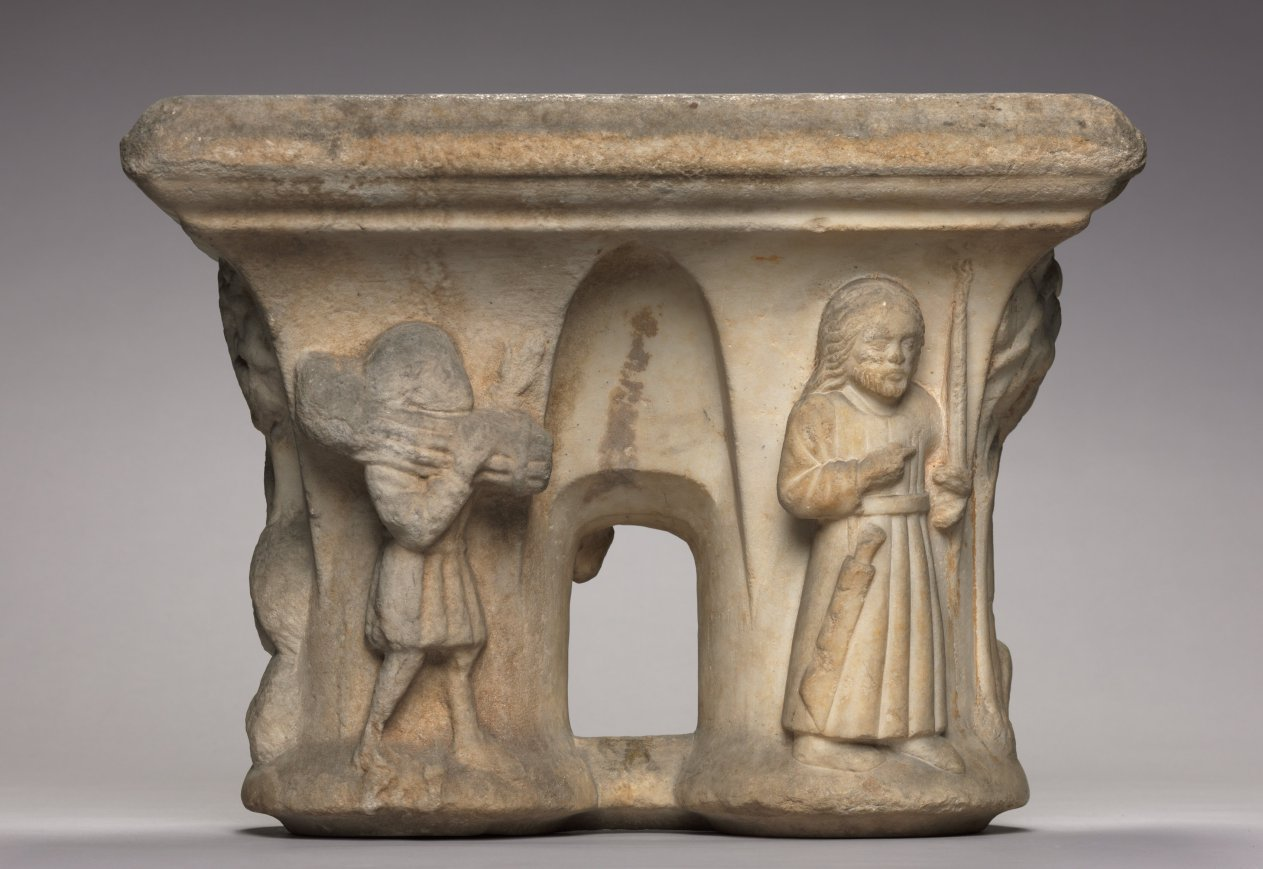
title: Engaged Capital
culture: Southern France, Abbey of Larreule, near Tarbes, 15th century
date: 1400s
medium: limestone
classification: Sculpture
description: This capital belongs to a surviving group including other architectural fragments that once decorated the cloister of the Abbey of Larreule. A cloister was a covered walkway or arcade, usually around all four sides of a square area of grass (the "cloister garth"). The seclusion of the cloister was the monks’ exclusive domain, off limits to others. Here, the monks were supposed to pray, study, meditate, and exercise in privacy and solitude. Such cloister capitals served both to instruct the monks and as a focus for their devotions. Other capitals in this series are installed in the Jardin Massey at Tarbes, near the original abbey. An arch from Larreule has been assembled with other associated French capitals at The Cloisters in New York.